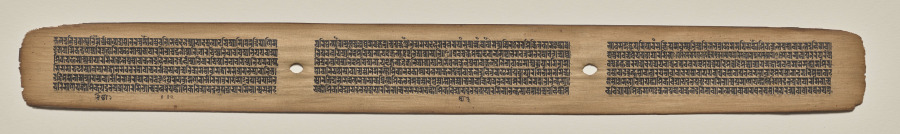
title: Text, Folio 19 (recto), from a Manuscript of the Perfection of Wisdom in Eight Thousand Lines (Ashtasahasrika Prajnaparamita-sutra)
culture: Eastern India, Bihar, Vikramashila Monastery. Painting: Nepal, Kathmandu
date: Sunday, September 14, 1119 (year 239 of the Newar Samvat in the month of Ashvina)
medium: gum tempera and ink on palm leaves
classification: Painting